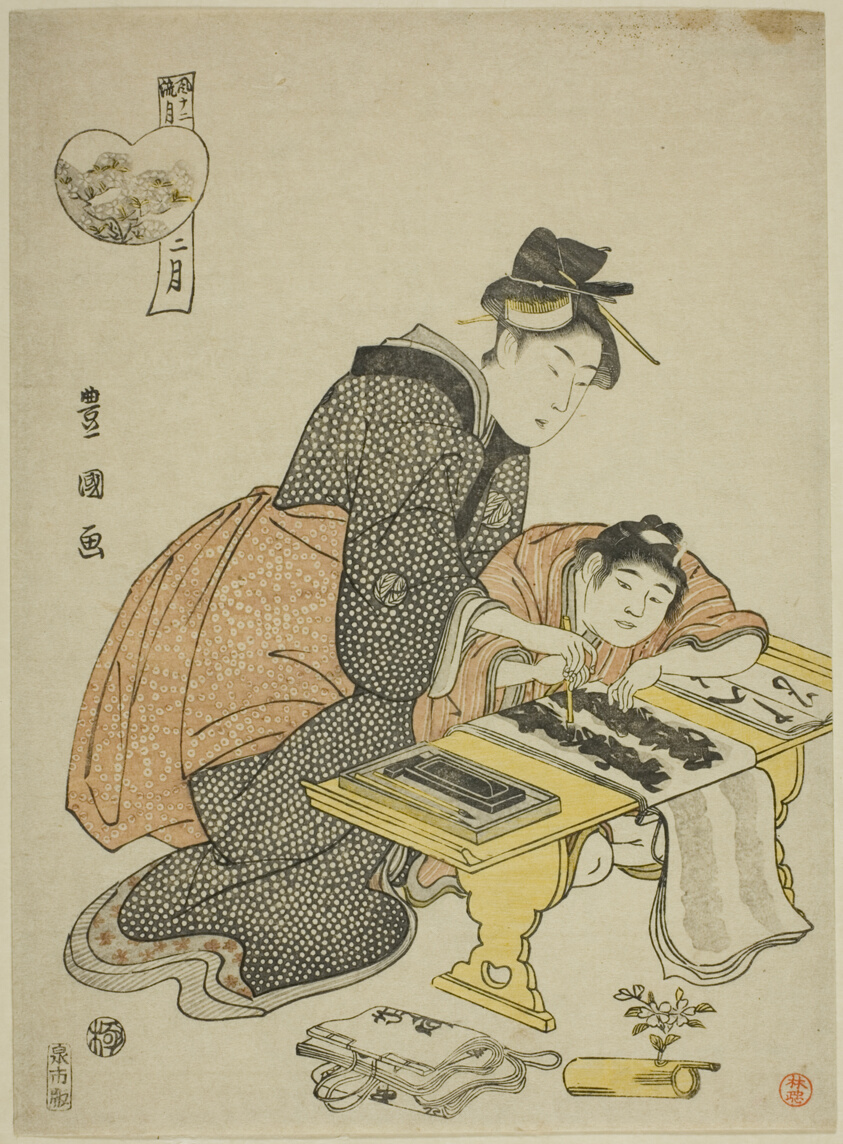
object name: Print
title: The Second Month (Ni gatsu), from the series "Fashionable Twelve Months (Furyu junikagetsu)"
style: Japanese (culture or style)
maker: Utagawa Toyokuni I 初代 歌川 豊国; Japanese, 1769–1825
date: c. 1793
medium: Color woodblock print; chuban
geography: Japan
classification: woodblock print; print; asian art